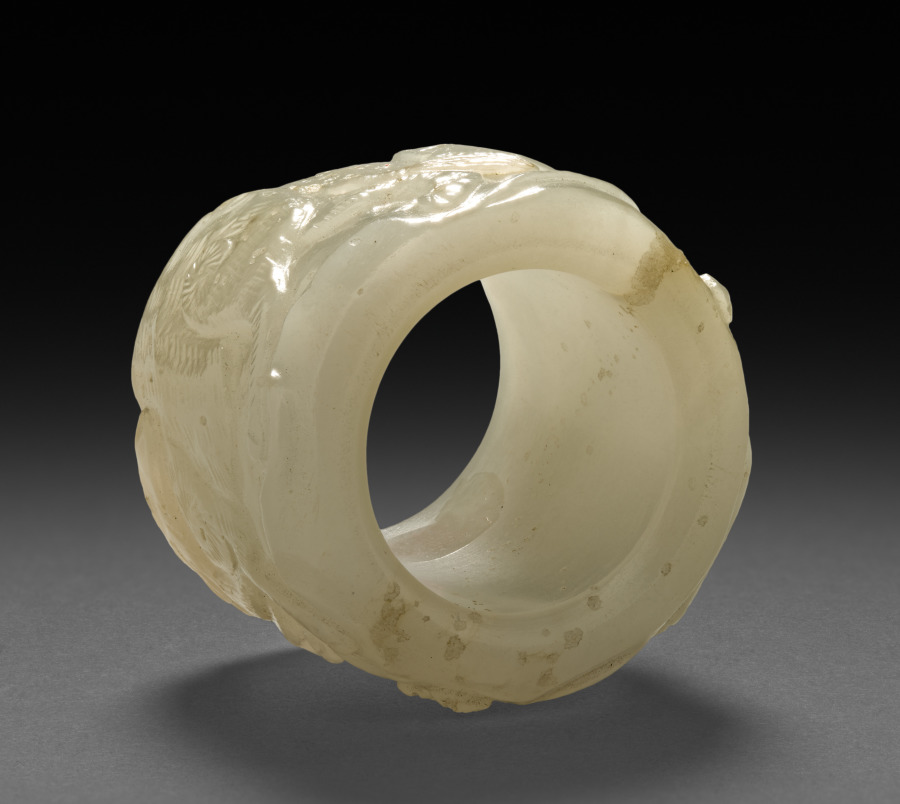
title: Thumb Ring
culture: China, Qing dynasty (1644-1911) or Republican period (1912-49)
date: 1800s–mid-1900s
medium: white jade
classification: Jewelry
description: Jade rings were worn by men on the thumb of the right hand to assist with holding and pulling the string of the archer’s bow. However, thumb rings were also fashionable accessories for civil officials in the late Qing dynasty.